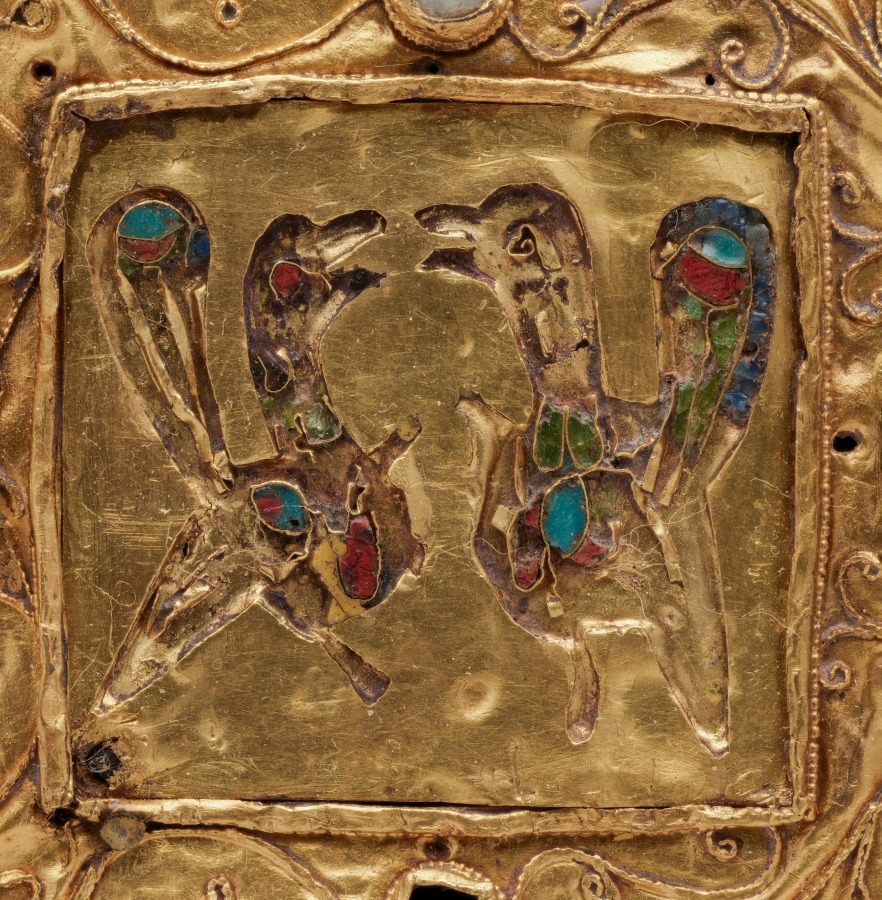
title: Ceremonial Cross of Count Liudolf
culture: Germany, Lower Saxony?, Romanesque period, 11th century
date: shortly after 1038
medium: gold: worked in repoussé; cloisonné enamel; intaglio gems; pearls; wood core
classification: Metalwork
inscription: translation of the inscription on back: Relics of the Holy Bishop Valerius, of the Holy Martyr Pancratius, of the Stone which was laid on the tomb of the Lord. This Gertrude had made for the spiritual welfare of Count Liudolf.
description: This precious gold cross was commissioned by Countess Gertrude (died 1077) and given to the church of Saint Blaise following the death of her husband, Count Liudolf of Brunswick (died 1038). The cross is decorated with a large oval-shaped chalcedony at its center and with slightly smaller rock crystals at its terminal ends. Fine but fragmentary cloisonné enamel plaques with pairs of confronting peacocks, symbols of immortality, appear at the center of each cross arms. They are set within an intricate system of filigree wire decoration imitating tendrils. Numerous pearls, three large intaglio gems, and various precious and semiprecious stones complete the decoration of the cross. Concealed behind the enamel plaque on the upper cross arm are relics of Saints Valerius and Pancratius as well as a fragment from the stone that sealed the Sepulcher of the Lord. The back of this cross is very worn, making it difficult to recognize the main features of its repoussé decoration. Faintly visible at the center is the Lamb of God, a symbol of Christ, with a cross-shaped halo. Depicted at the end of the cross arms are the symbols of the four Evangelists. A Latin inscription above the Lamb of God identifies the relics concealed behind it, namely "relics of the saintly bishop Valerius, of Pancratius martyr, [and] of the stone that was placed above the tomb of the Lord." A second inscription below states, "This [work] was commissioned by Gertrude for the soul of Count Liudolf," revealing the identity of the cross's patron and the approximate date of its commission.